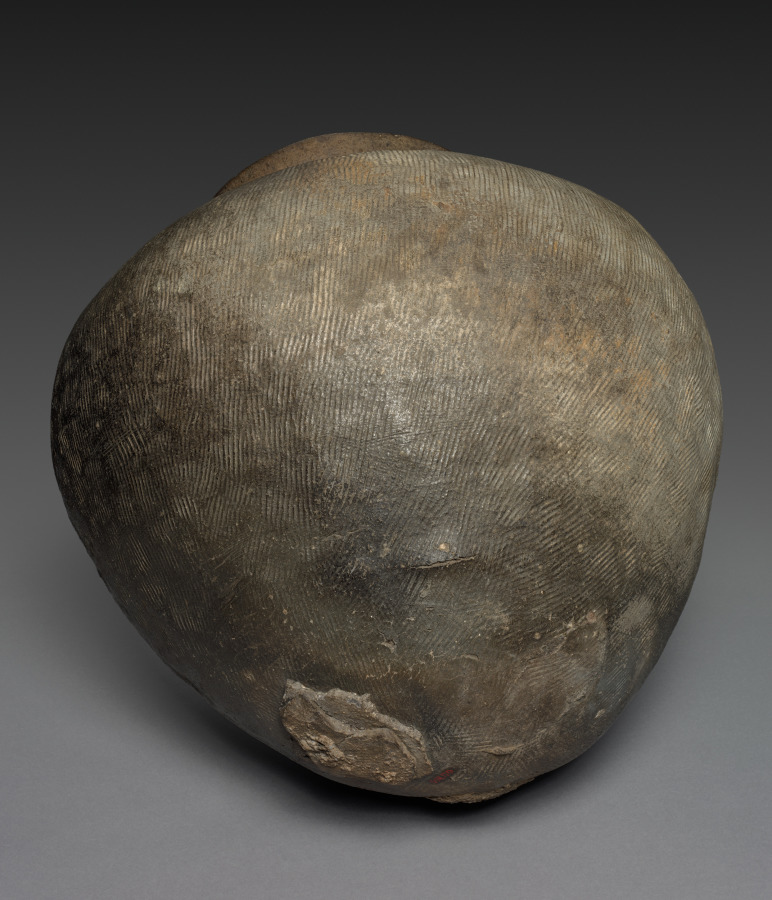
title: Storage Jar: Sueki ware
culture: Japan, Nara period (710–94)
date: 700s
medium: stoneware with incised and impressed decoration and natural ash glaze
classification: Ceramic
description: This robust vessel was formed from clay coils that were beaten inside and out with wooden paddles to compress the body walls and merge the coils. In addition, the exterior surface was paddled and scored with carved wooden tools to decorate the body walls. Finally, the vessel was turned on a potter's wheel to attach the neck with a smoothly finished surface. A high firing (approximately 1000°), which culminated with a reduced oxygen phase, produced the dark gray surface tone. Sueki ware ceramics originated in the mid-400s, when Korean potters and kiln builders established clusters of kilns in the modern Osaka area. Other production centers were established in the outlying provinces by the late 500s, providing for the diffusion of this ceramic ware throughout the country into the 1000s. Sueki wares demonstrate ancient Japan's close cultural ties with the Korean peninsula. Similar vessels have been recovered from sites in the southern regions of the Korean peninsula.